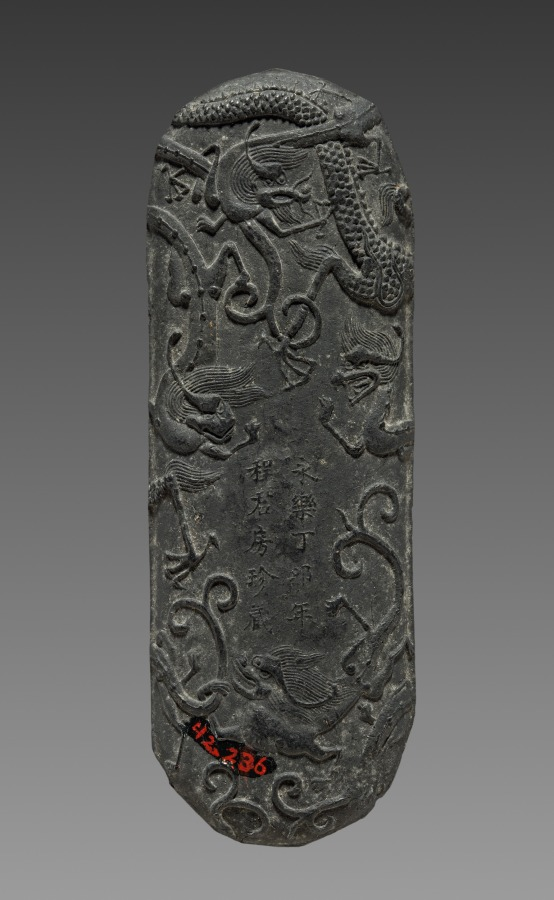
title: Ink Cake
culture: China, Ming dynasty (1368–1644)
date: 1368–1644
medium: ink cake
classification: Miscellaneous